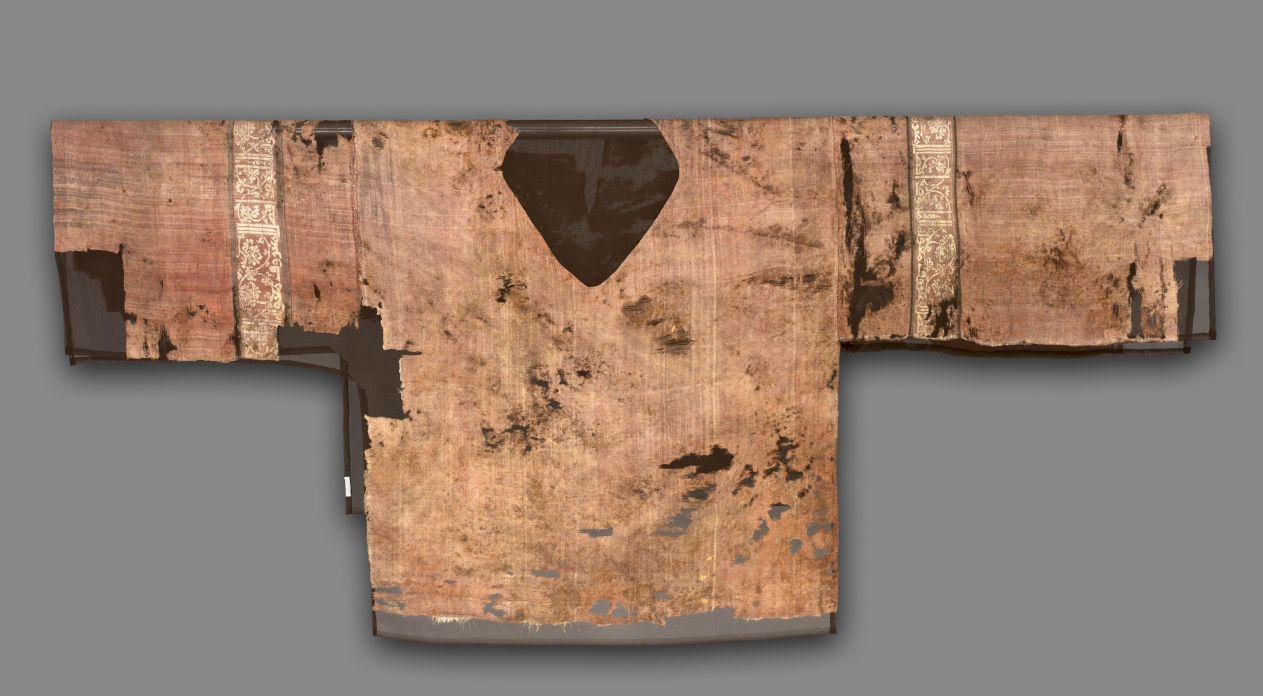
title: Tunic with Ornamental Inscription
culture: Iran or Iraq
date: 1329–1955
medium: Silk: lampas weave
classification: Textile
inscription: Afdal al-ma 'ruf ma'unat al-malhuf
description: The sleeves, neck opening, and most of the front area nearly to waist are preserved; the back has large areas missing. The foliated inscription bands on the sleeves near the shoulder seams are in white (faded from blue) on a pink and brown ground.